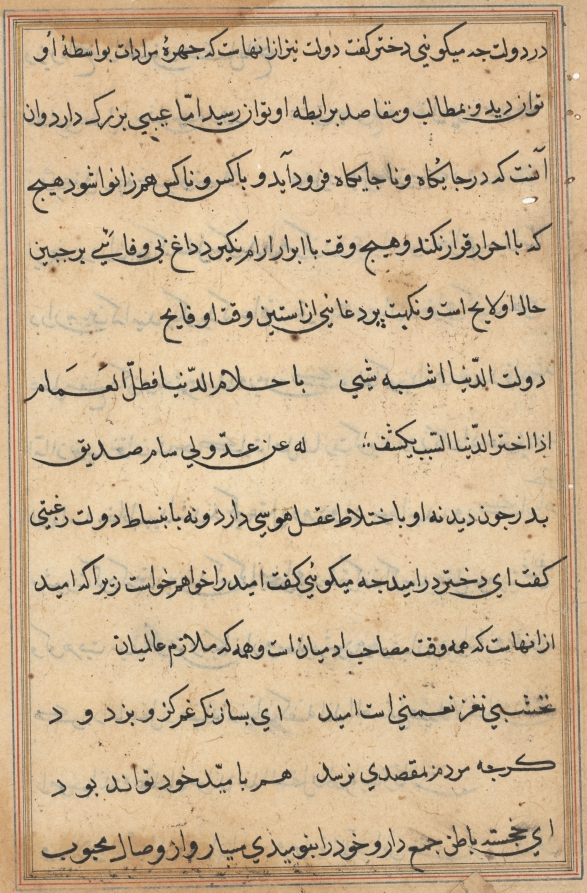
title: Page from Tales of a Parrot (Tuti-nama): text page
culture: Mughal India, court of Akbar (reigned 1556–1605)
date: c. 1560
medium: gum tempera, ink, and gold on paper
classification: Painting